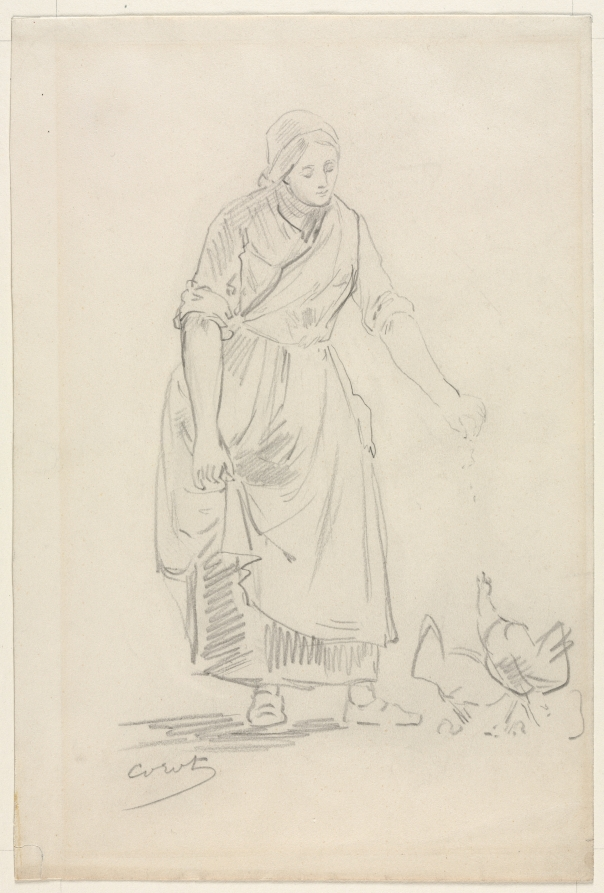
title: Peasant Girl Feeding Chickens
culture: France, 19th century (?)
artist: Jean Baptiste Camille Corot (French, 1796–1875)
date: 1800s(?)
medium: graphite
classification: Drawing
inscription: signed, lower left, in graphite: Corot [underlined] ; VERSO, lower center, in graphite: to 154